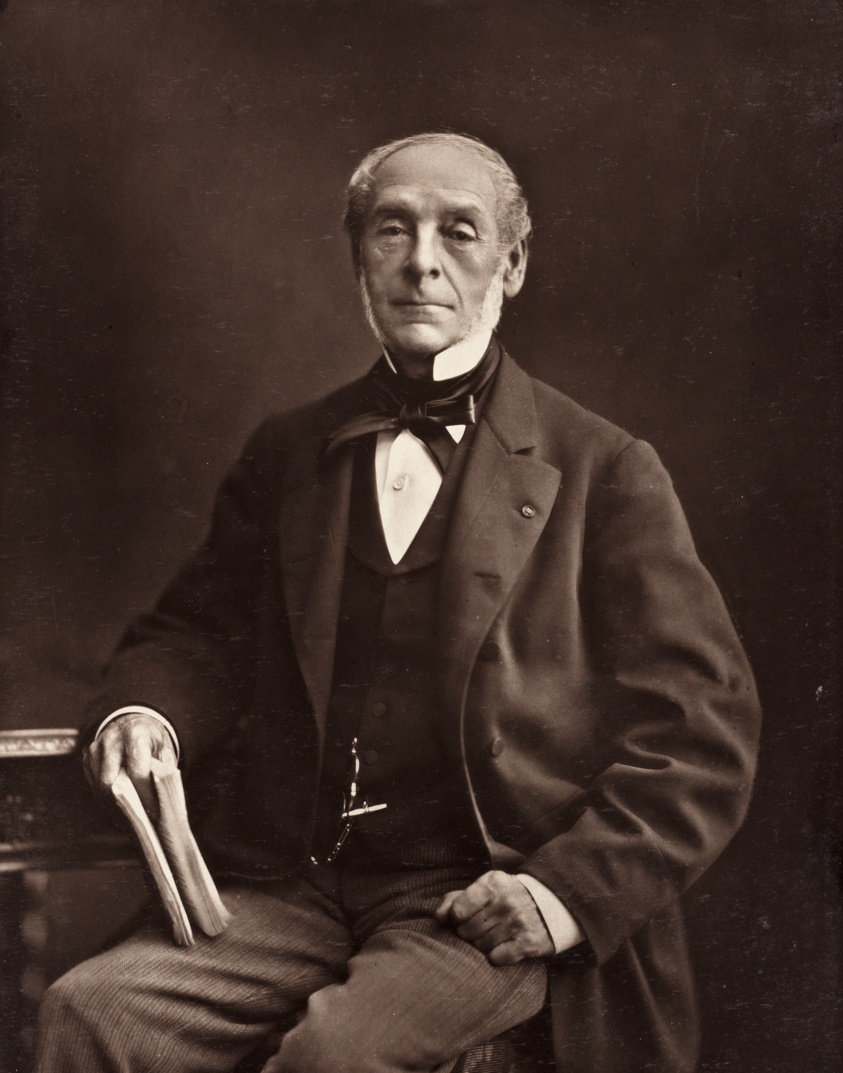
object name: Photograph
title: Ernest Legouvé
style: 19th century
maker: Nadar (Gaspard Félix Tournachon) (French, 1820–1910)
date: 1853/76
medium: Woodburytype, from the periodical “Galerie Contemporaine Littéraire, Artistique” (1876), volume 3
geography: France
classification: woodburytype; photomechanical process; photography; photograph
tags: Collected by Hugh Edwards, Contemporaine Littéraire